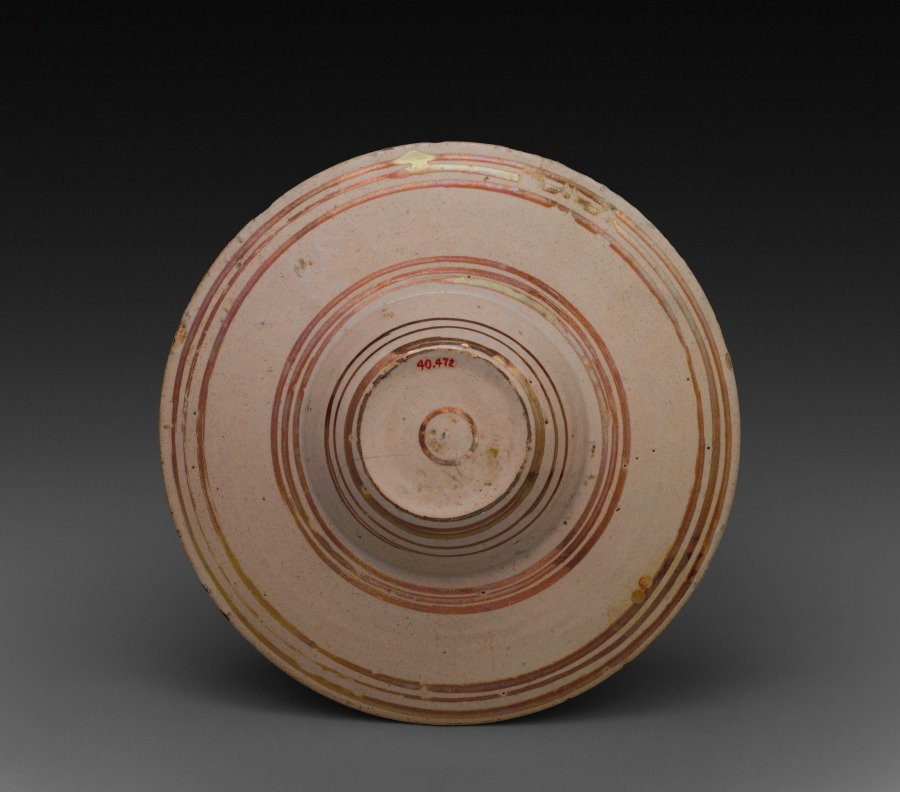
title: Plate with the Arms of the Rizzardi Family of Venice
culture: Italy, Gubbio, 16th century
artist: attributed to Maestro Giorgio Andreoli (Italian, 1465?–1553)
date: c. 1525–1530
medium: tin-glazed earthenware with gold and red lustre (maiolica)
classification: Ceramic